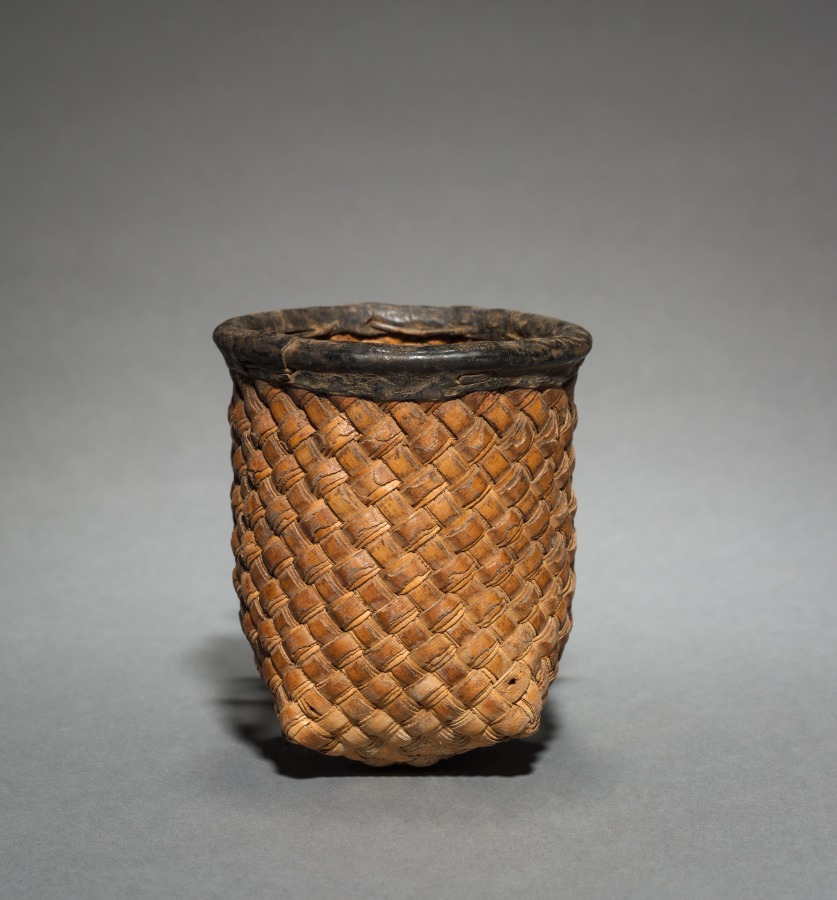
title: One of Ten Nesting Wedding Baskets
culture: Africa, Western Sudan, Burkina Faso, Lobi, 20th century (?)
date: c 1900s ?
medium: Plant fiber and leather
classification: Vessels